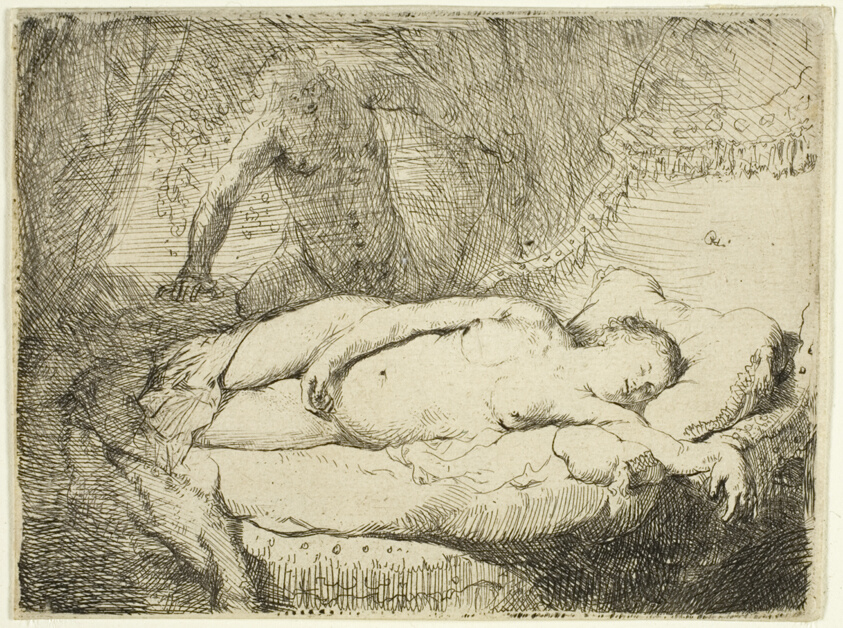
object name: Print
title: Jupiter and Antiope: Smaller Plate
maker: Rembrandt van Rijn (Dutch, 1606-1669)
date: c. 1631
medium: Etching on buff laid paper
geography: Holland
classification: etching; print; prints and drawing; paper